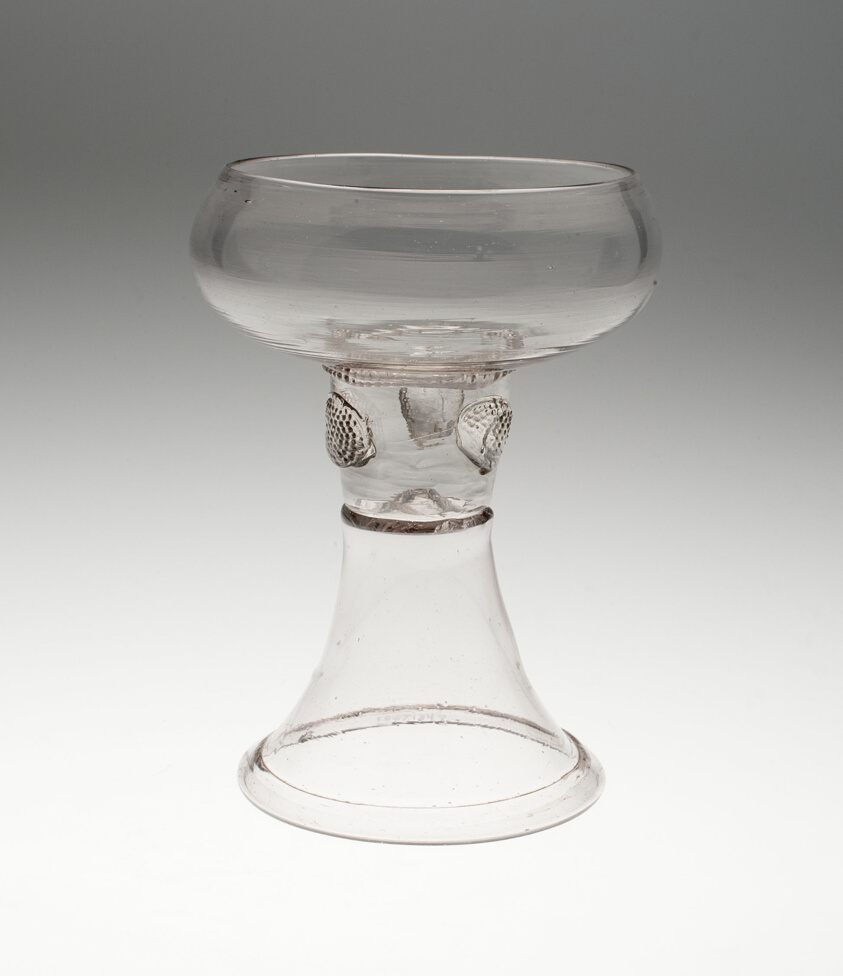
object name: Glass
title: Prunted Beaker (Roemer)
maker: Northern Germany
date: 1700/25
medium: Glass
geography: Northern Germany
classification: drinking vessel; glass; european decorative arts